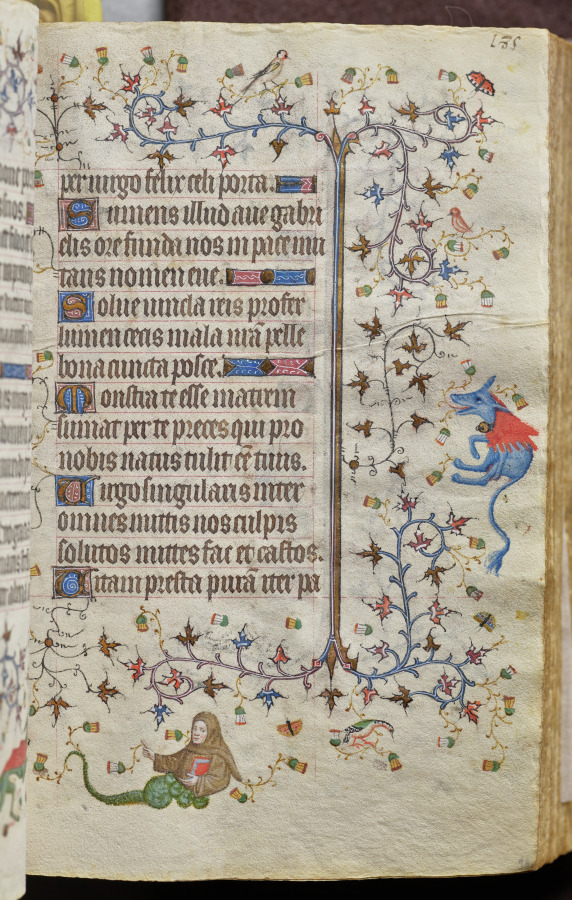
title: Hours of Charles the Noble, King of Navarre (1361-1425): fol. 93r, Text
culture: France, Paris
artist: Master of the Brussels Initials and Associates (French)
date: c. 1405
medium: ink, tempera, and gold on vellum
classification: Bound Volume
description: This precious volume was obviously highly prized by its owner, the French-born King of Navarre, who had his coat of arms painted on no less than twenty folios. Rather than directly commissioning this manuscript from a specific workshop, it seems that Charles the Noble acquired his book of hours -- perhaps ready-made for the luxury market -- while on a trip to Paris in 1404-05. A collaborative effort, six painting styles are evidenced within the pages of this codex, those of two Italians, two Frenchmen, and two Netherlanders. The painter who was responsible for the planning and decoration of the book, and who produced seventeen of the large miniatures, was a Bolognese artist known as the Master of the Brussels Initials. His principal assistant, responsible for most of the borders, was a Florentine who signed his name "Zecho" da Firenze on folio 208 verso.